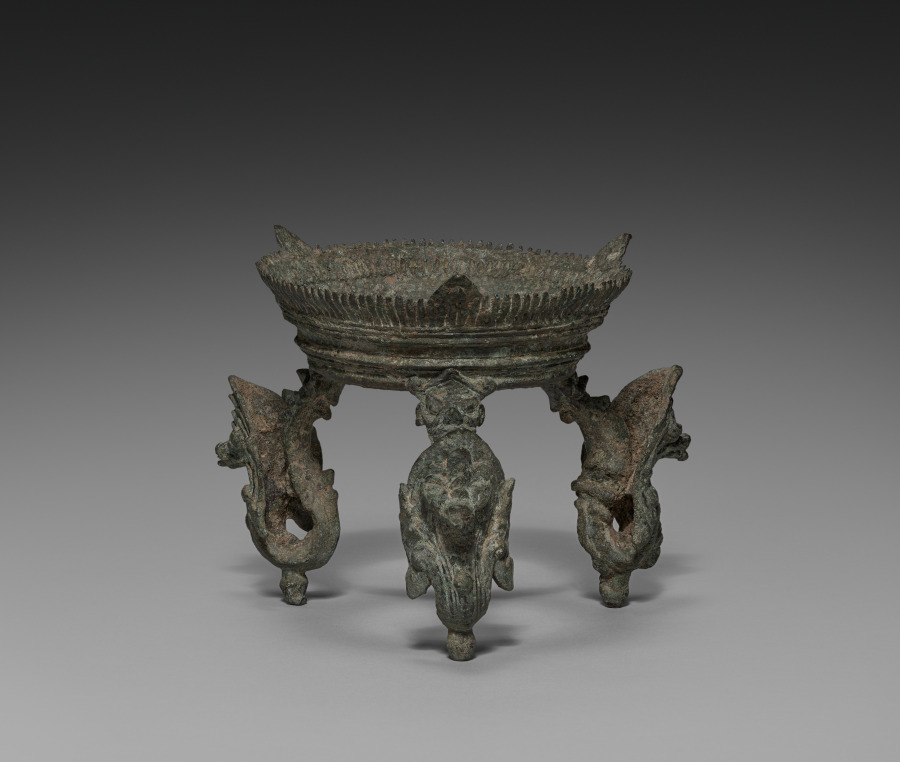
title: Tripod stand with nagas for a ritual conch shell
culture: Cambodia, Khmer, Angkor Period, 12th-13th Century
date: 1100s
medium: shell and bronze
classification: Sculpture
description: A royal temple like Banteay Chhmar was built for performing rituals and to honor images of gods, Buddhas, and other sacred or enlightened beings for the sake of the kingdom’s protection and ongoing prosperity. Conch shells were blown at the start of rituals to make the sound corresponding to the syllable om. The dancing figure of Hevajra, a Buddhist being of enlightenment with eight heads, sixteen arms, and four legs, has been worked into the bronze embellishment of the shell. Hevajra was elevated to a prominent position in Khmer Buddhism of the Angkorian period as the standard figure denoting the practice of rituals prescribed in a text called the Hevajra-tantra. The tripod stand with three serpents is probably not original to the shell.